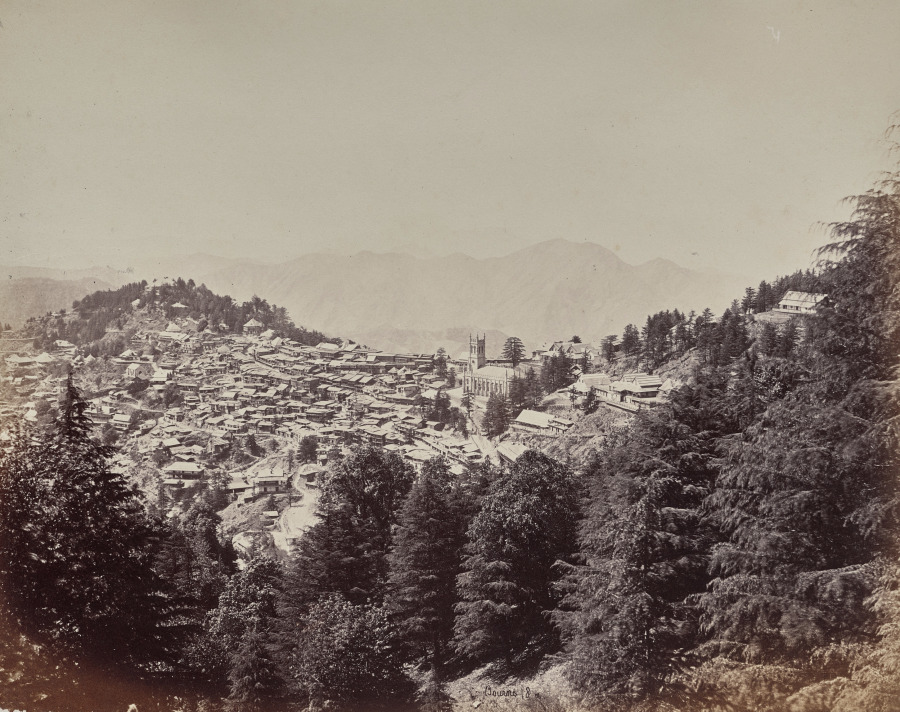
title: Shimla. From Mount Jakko, Looking West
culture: England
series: Photographs of Northern India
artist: Samuel Bourne (British, 1834–1912)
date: 1863–70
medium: albumen print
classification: Photograph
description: The 50 images in this album, all taken in the 1860s, move from the hill towns of the Himalayas down to cities including Lahore (now in Pakistan), Delhi, Lucknow, Agra, Benares (now Varansi), and Calcutta (now Kolkata). Architectural studies of major monuments offer valuable historical records of what sites such as the Taj Mahal and the imperial mosque of the Mughal emperors in Delhi looked like before twentieth-century restorations.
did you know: Samuel Bourne, the author of most the images in this album, was a banker in England before he moved to India to become a professional photographer.